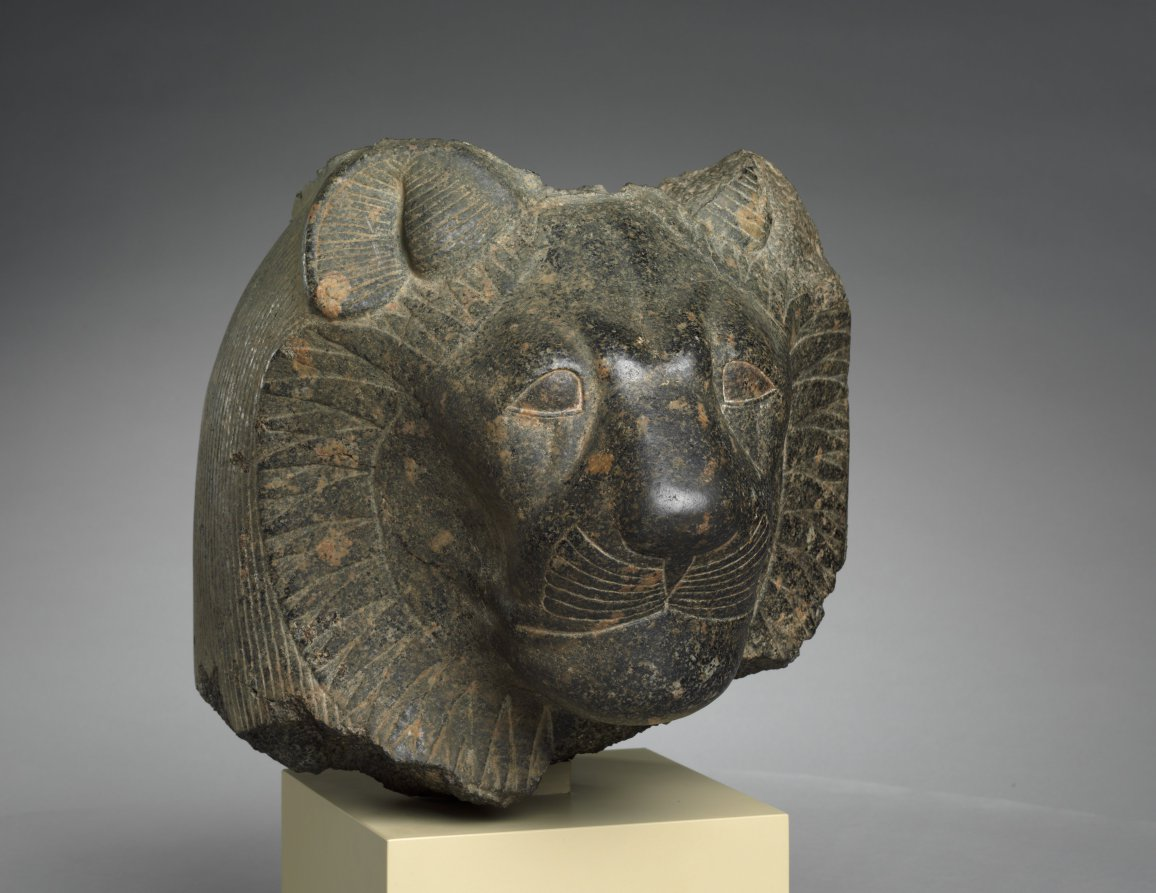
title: Head of Sekhmet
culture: Egypt, Thebes(?), New Kingdom (1540–1069 BCE), Dynasty 18, reign of Amenhotep III (1390–1352 BCE)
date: c. 1391–1353 BCE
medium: granodiorite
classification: Sculpture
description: This lioness head once belonged to a grand statue of the goddess Sekhmet, "the powerful one," probably seated and wearing a tight dress. Possibly appealing to her healing aspect, Pharaoh Amenhotep III, often described as “beloved of Sekhmet,” commissioned and dedicated hundreds of large granodiorite Sekhmet sculptures in his Theban mortuary temple. Thus, this head likely comes from Thebes, perhaps later moved across the Nile—like many such sculptures—to the temple of Mut, a related deity, at Karnak. Behind her stylized ruff, Sekhmet wears a wig, once crowned with a sun disk and uraeus, the stylized cobra symbolizing royal or divine power.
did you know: Amenhotep III may have dedicated 730 statues of Sekhmet, two for each day of the year.